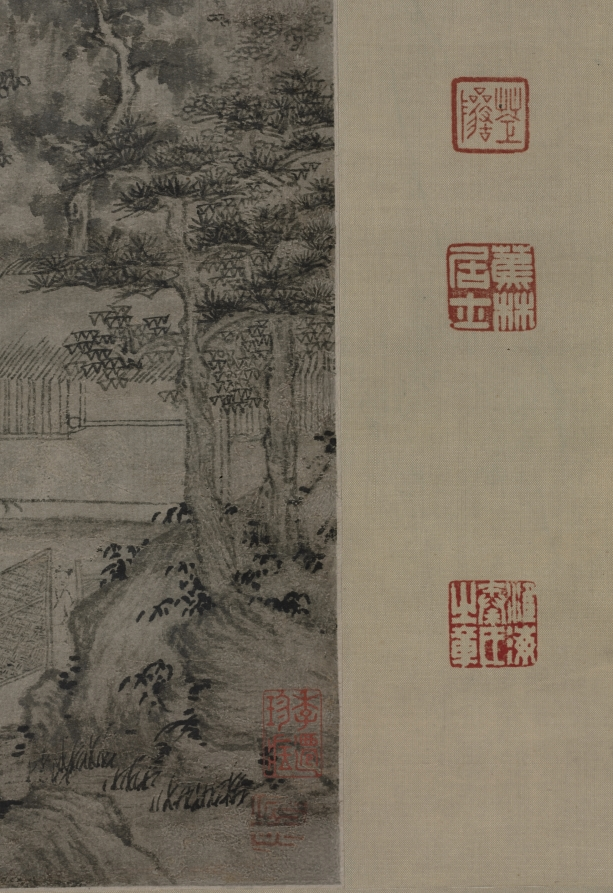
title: Streams and Mountains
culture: China, Yuan dynasty (1271-1368)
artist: Xu Ben (Chinese, 1335–1380)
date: 1372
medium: hanging scroll, ink on paper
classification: Painting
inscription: 綠樹黃鸝處處山， 偶從谿上看雲還。/ 人生未許全無事， 纔得登臨便是閑。 壬子七月十日徐賁為吉夫先生畫 並詩共上 [印] 幼文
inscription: Label on mounting probably by Liang Qingbiao 梁清標 (1620–1691).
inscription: 4 additional inscriptions and 9 additional seals: 1 poem of Xie Hui 謝徽 (c. 2nd half 14th c.); 1 poem and 1 seal of Gao Qi 高啟 (1336–1374); 1 poem and 1 seal of Lu Zhen 盧貞 (c. late 14th c.); 1 poem of Huang Zai 黃載; 3 seals of Liang Qingbiao 梁清標 (1620–1691); 1 seal of Wang Jiqian [C. C. Wang] 王季遷 (1907–2003); 3 seals unidentified.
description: Like many literati of the late Yuan and early Ming dynasties, Xu Ben was entangled with the perils of dynastic change as well as the ups and downs of his official career. It was mainly through the art of painting and poetry, as well as the ideal of reclusion, that he sought feelings of exhilaration and shared them with his friends. Xu created this monumental landscape during one of his periods of reclusion. His innumerable “hemp-fiber” texture strokes create a unifying rhythm among the towering mountains with tightly knit masses of rocks. Nestled among shady trees at the base of the mountain is a rustic retreat, which a scholar approaches on foot to visit with the hermit. Among the five inscriptions at the top of the painting is one by the artist himself. He dedicated the painting to someone named Jifu 吉夫 and recorded a poem in praise of mountains. Green trees, yellow orioles, everywhere are mountains; Aimlessly I return from the stream, where I watched the clouds. Man's life does not allow unbroken ease, But to be able to be high up in the mountain, this is leisure.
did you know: An attendant opens a reed gate to welcome the scholar with a walking stick approaching the rustic retreat.